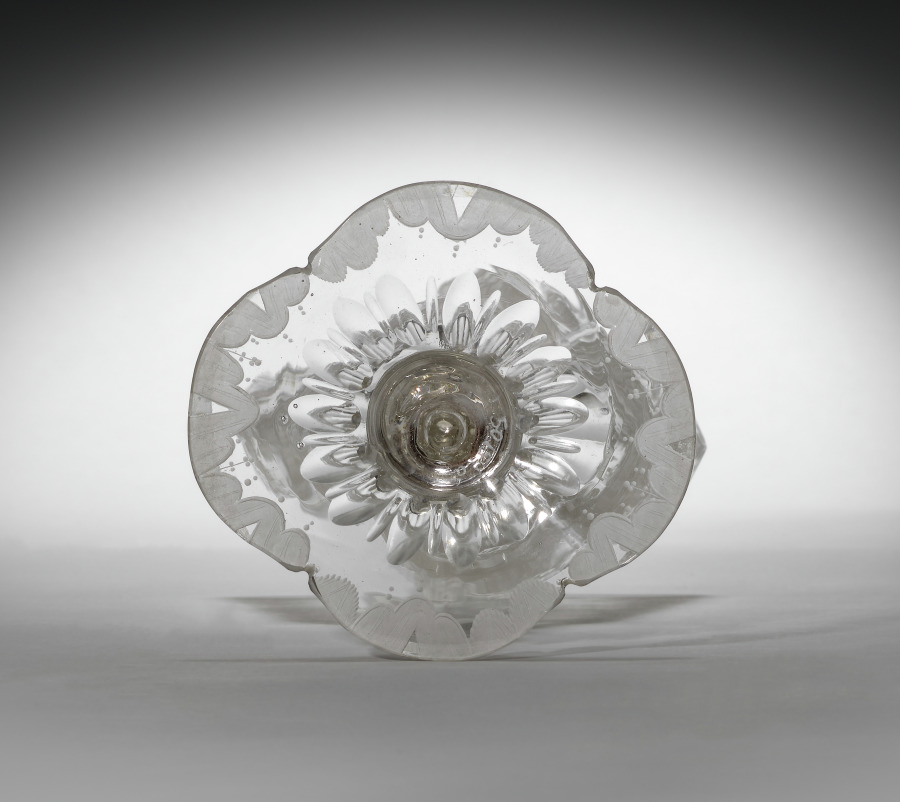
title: Standing Cup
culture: Germany, Silesia, 18th century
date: c. 1725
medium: glass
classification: Glass